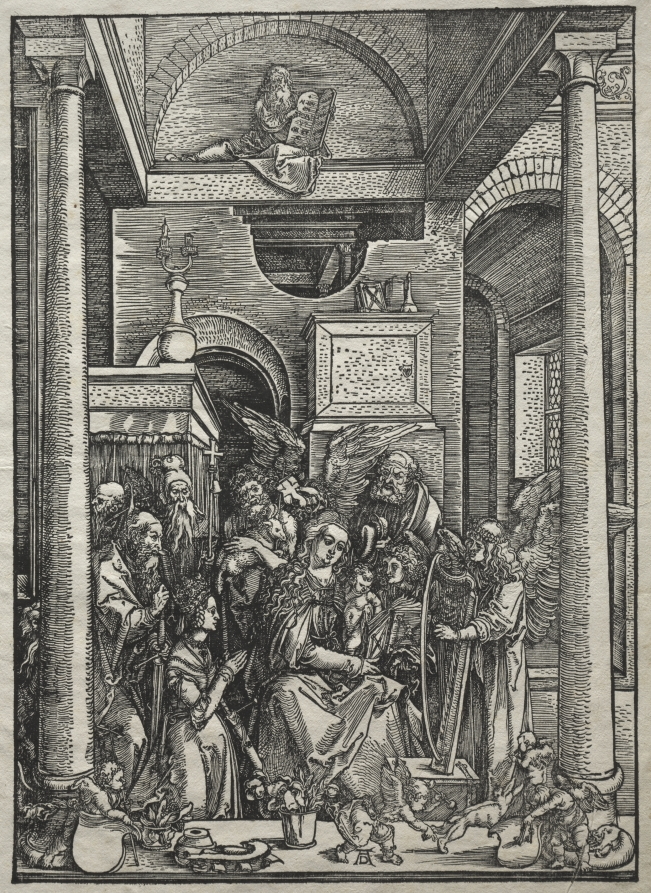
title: Life of the Virgin: Adoration of the Virgin and Child by Saints and Angels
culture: Germany, early 16th Century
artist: Albrecht Dürer (German, 1471–1528)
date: 1504–1505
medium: woodcut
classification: Print